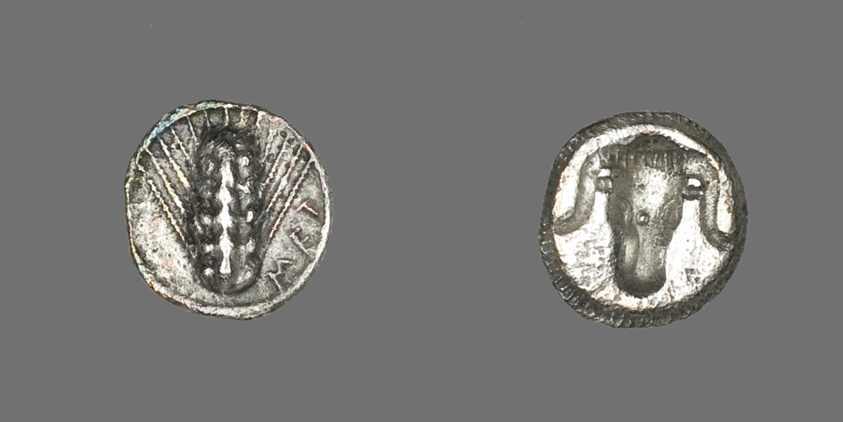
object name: Coin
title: Diobol (Coin) Depicting an Ear of Grain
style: archaic (greek)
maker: Greek; minted in Metapontum, Italy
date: 500-473 BCE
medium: Silver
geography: Metaponto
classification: coin; ancient art